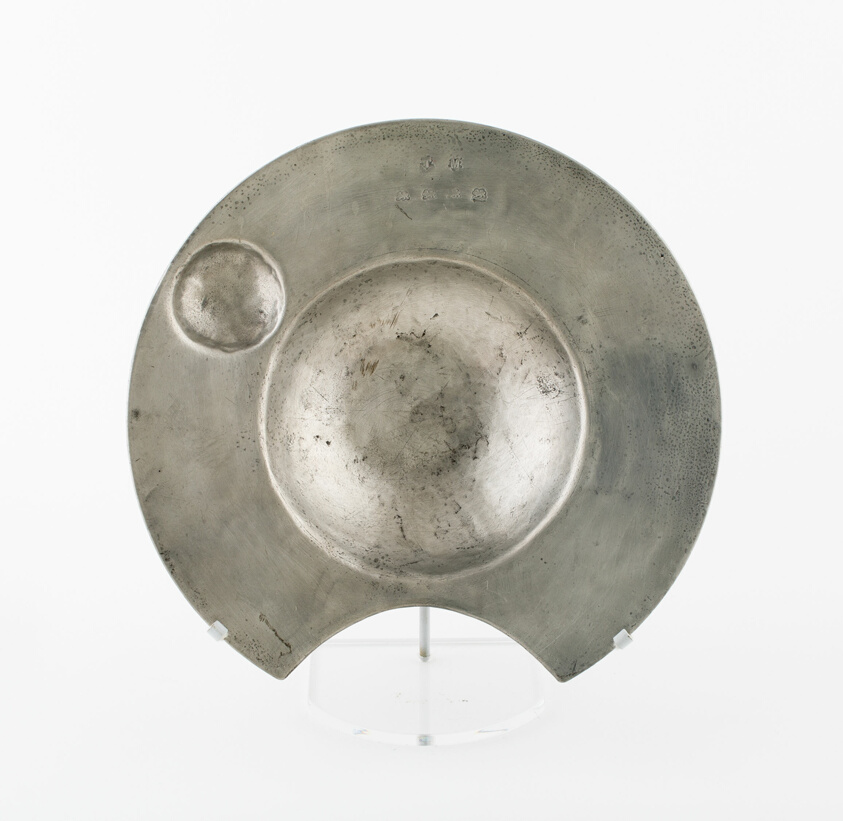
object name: Metalwork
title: Barber's Bowl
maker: William Allen; English, active 1674-1695; England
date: c. 1680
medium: Pewter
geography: London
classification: personal grooming / hygiene / cosmetic container; pewter; metalwork; european decorative arts